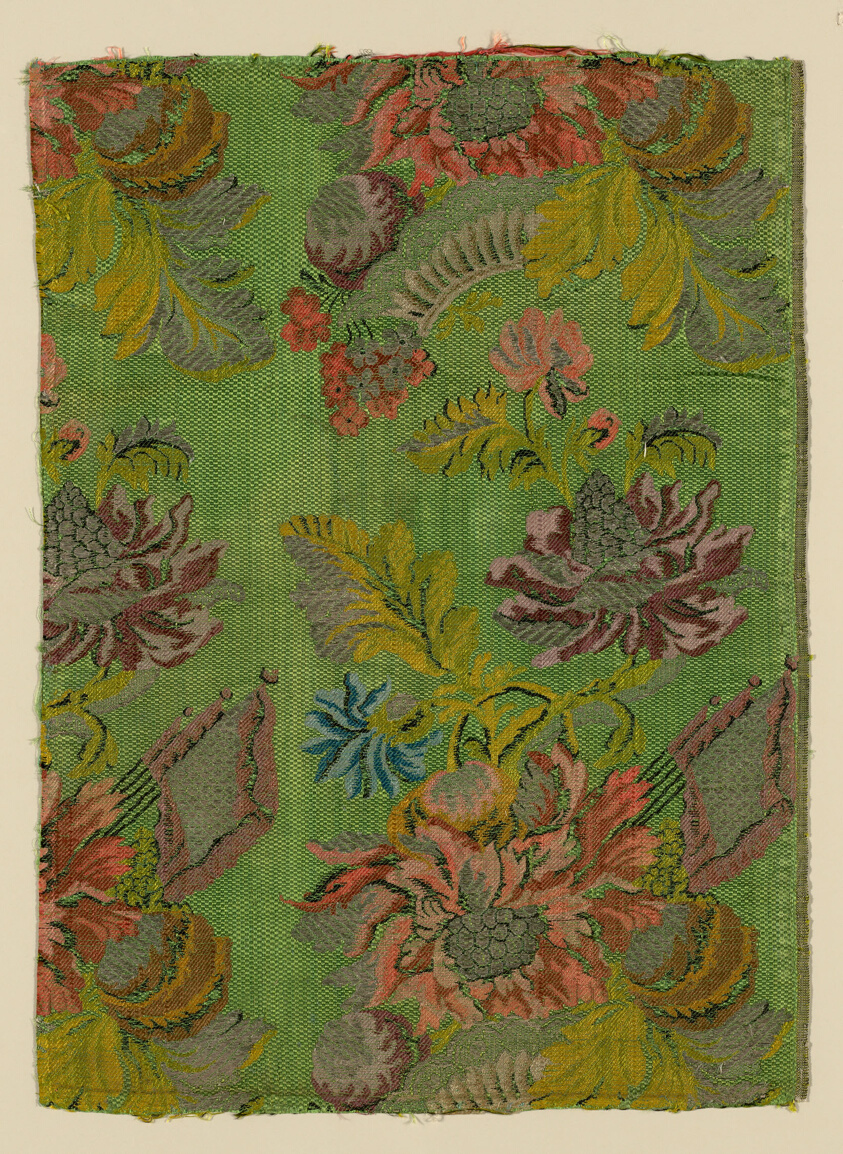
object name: Textile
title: Panel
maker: France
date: 1701/25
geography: France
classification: textile; weaving